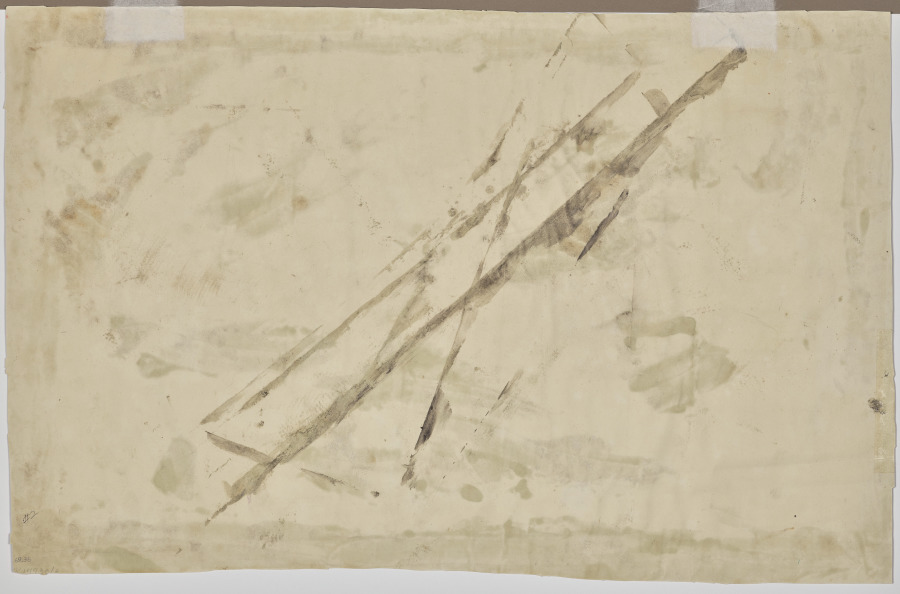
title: A Raja on an Elephant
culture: India, Rajasthan, Ajmer area, possibly Sawar school, late 17th Century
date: c. 1680–1700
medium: ink with touches of color on paper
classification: Drawing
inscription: Torn inscription at top left: "Maharaja L [?]...."